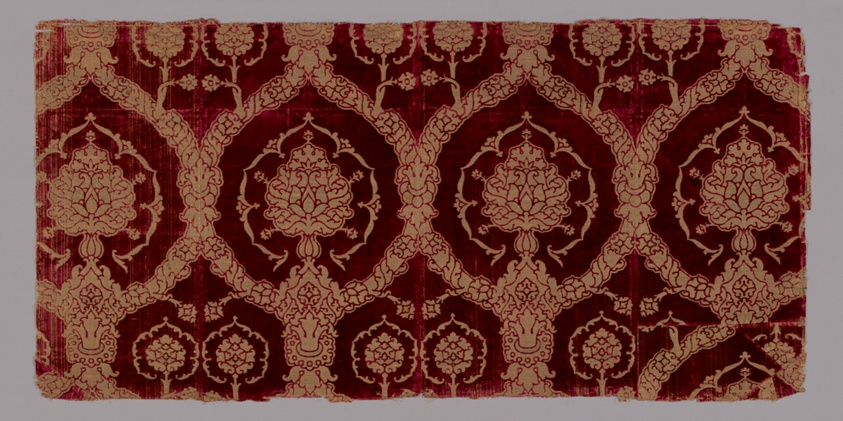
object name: Religious/Ritual Object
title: Altar Frontal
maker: Spain or Italy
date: 1480-1550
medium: Silk, warp-float faced 3:1 'Z' twill weave with supplementary discontinuous facing brocading wefts forming areas of weft loops (known as bouclé) tied by secondary binding warps in weft-float faced 3:1 twill interlacing and supplementary pile warps forming cut, pile on pile, voided velvet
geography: Spain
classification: textile; weaving - velvet; liturgical; ritual objects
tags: pomegranates